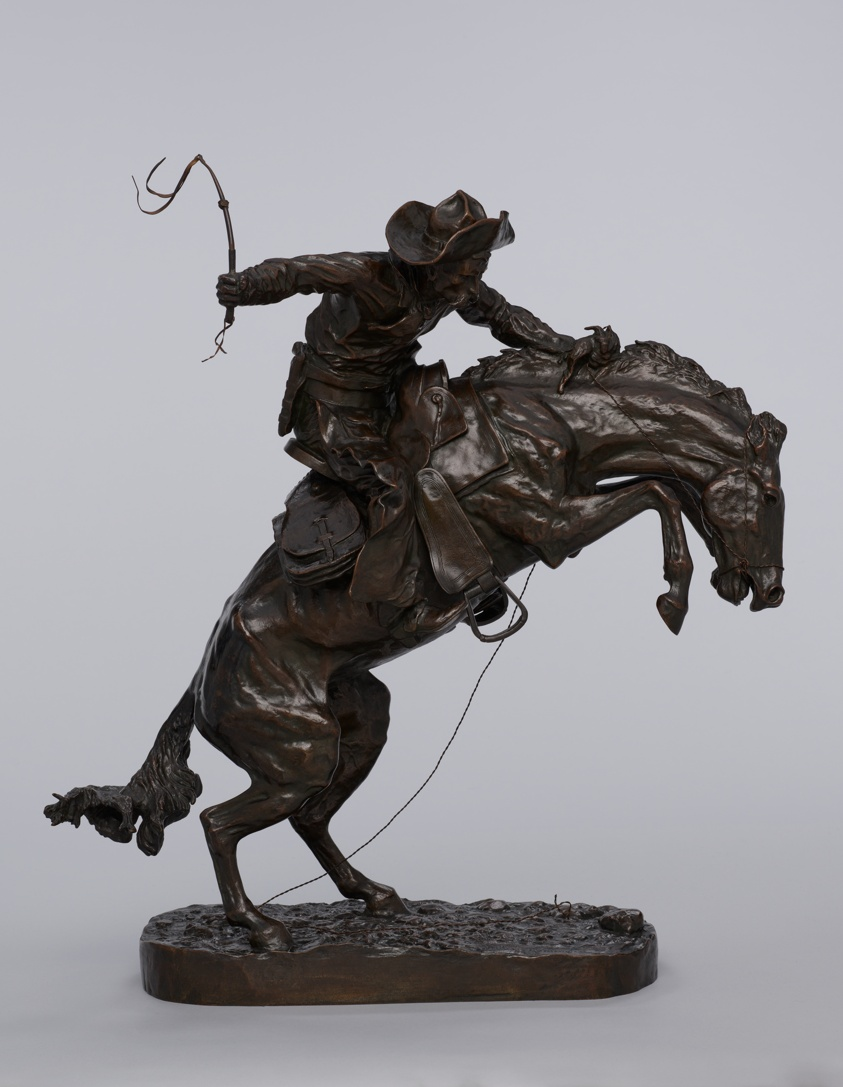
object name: Sculpture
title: The Bronco Buster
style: 19th century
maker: Frederic Remington (American, 1861–1909); Cast by Henry-Bonnard Bronze Co. (American, 19th century)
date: Modeled 1895, cast 1899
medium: Bronze with brown patina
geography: United States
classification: sculpture; american arts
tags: animals, rodeos, cowboys, horses, horseback riding, people, portraits